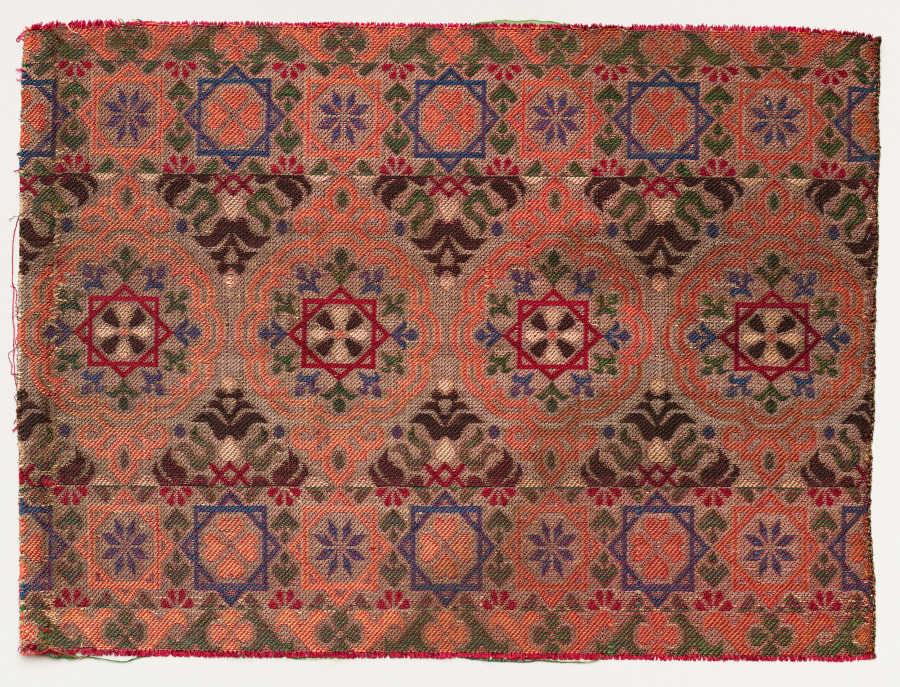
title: Fragment of a belt (hizam)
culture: Africa, North Africa, Morocco, Moroccan weaver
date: 1800s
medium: Silk, dye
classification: Textile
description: This silk textile with a lampas weave features alternating designs of eight-pointed stars, ogival (curved) medallions, and floral patterns. This fragment would have likely once been part of a wider belt, called hizam, worn by elite Moroccan women over their gowns.